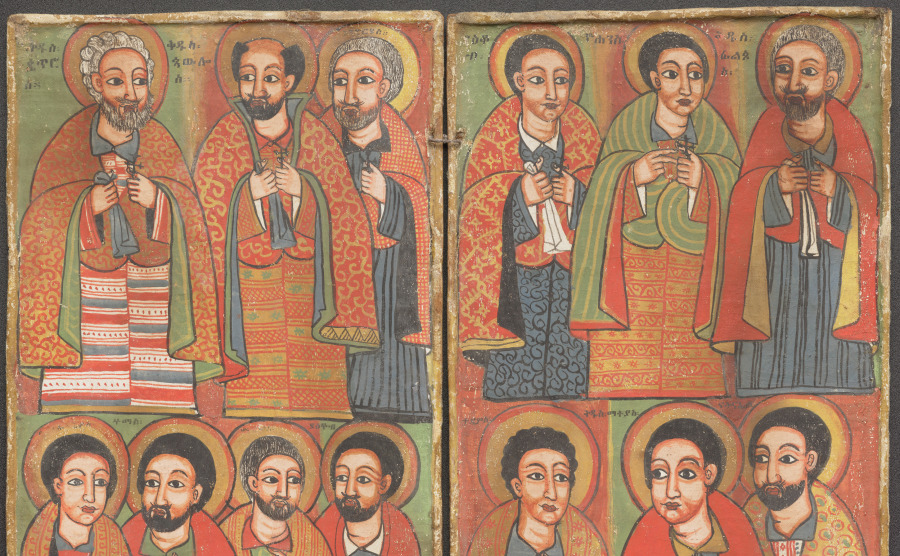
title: Diptych with Twelve Apostles & St. Paul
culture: Africa, East Africa, Ethiopia, presumably Gondär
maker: Workshop or Circle of Wäldä Maryam (Ethiopia, active mid- to late 1600s-early 1700s)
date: c. 1700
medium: Tempera, wood, textile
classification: Painting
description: Depicting 13 holy men, this diptych (two-panel painting) is sized for an Ethiopian Orthodox Christian church or elite home. It is painted in the bold, colorful style associated with royal court workshops from the early 1600s to the mid-1700s. Painter Wäldä Maryam (or someone he trained) set this scene of Christ’s apostles in the context of his homeland. Each saint wears fashionable clothing imported from India. While they are posed and dressed similarly to emphasize their group identity, the artist portrayed their faces and hairstyles individually. Captions in Ge’ez––an eastern African language dating to the 400s BCE––identify each by name.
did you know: Captions written in the language Gəˁəz identify each holy man by name. This African language is nearly 2,500 years old!